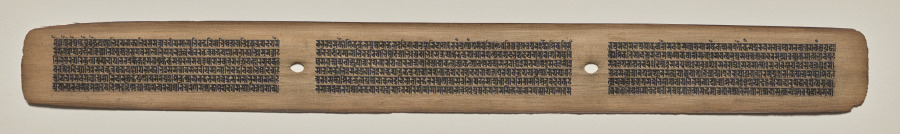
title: Text, Folio 24 (recto), from a Manuscript of the Perfection of Wisdom in Eight Thousand Lines (Ashtasahasrika Prajnaparamita-sutra)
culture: Eastern India, Bihar, Vikramashila Monastery. Painting: Nepal, Kathmandu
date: Sunday, September 14, 1119 (year 239 of the Newar Samvat in the month of Ashvina)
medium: gum tempera and ink on palm leaves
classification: Painting